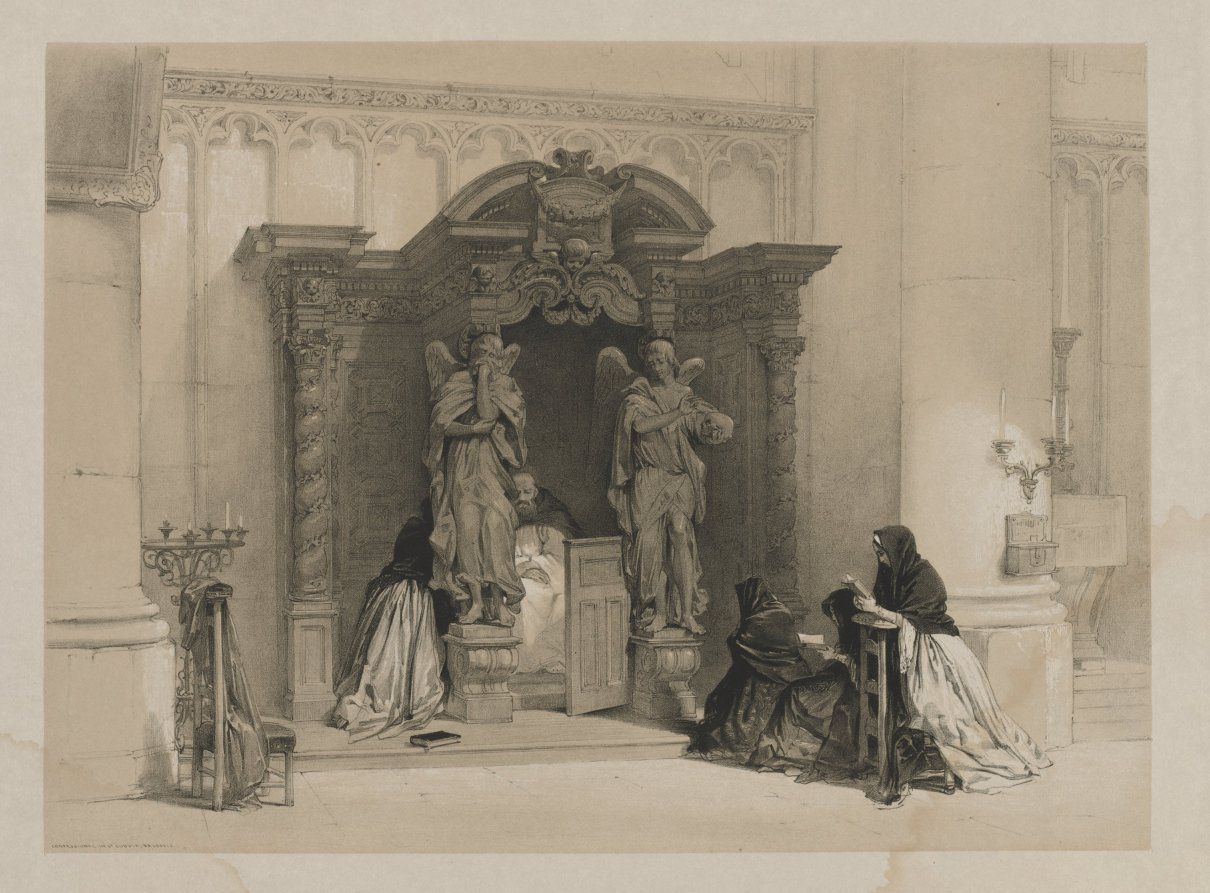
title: Sketches in Belgium and Germany, Volume I: Confessional in St. Gudule, Brussels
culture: England, 19th century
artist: Louis Haghe (British, 1806–1885)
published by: Hodgson & Graves, 6 Pall Mall, London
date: 1840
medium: color lithograph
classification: Portfolio